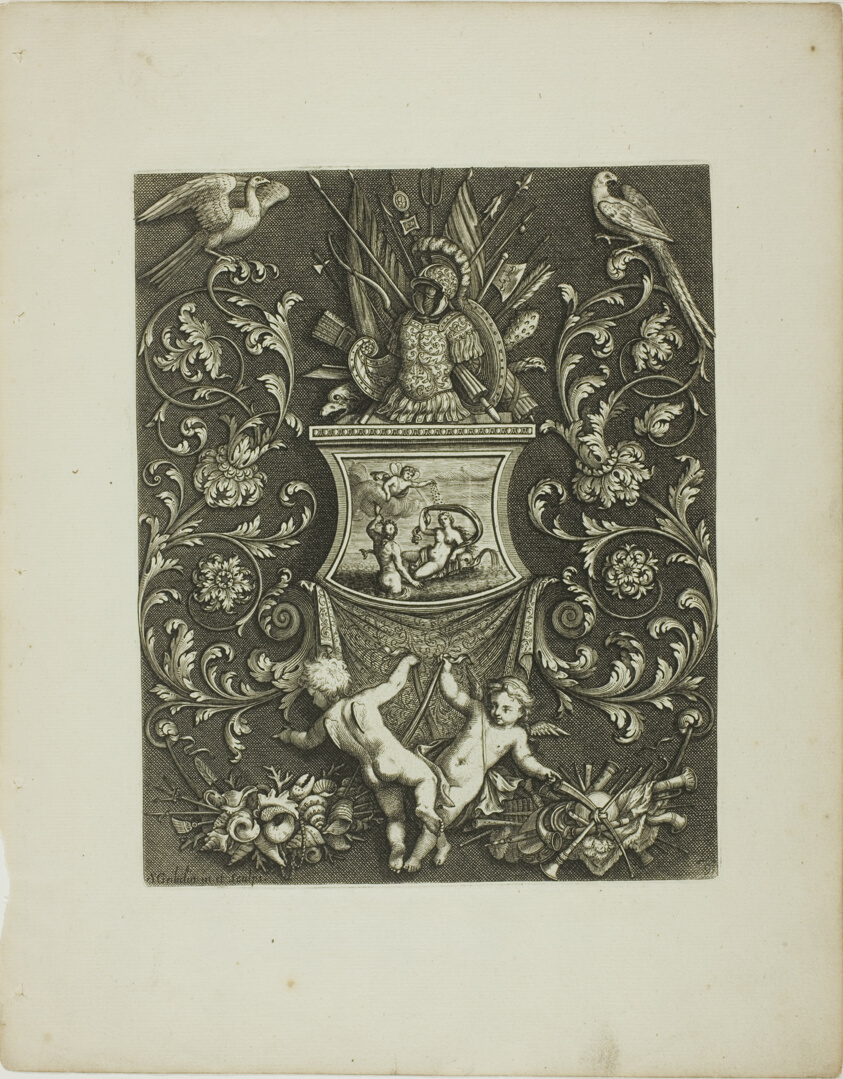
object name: Print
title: Plate Nine, from A New Book of Ornaments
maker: Simon Gribelin II; French, 1661-1733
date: 1704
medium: Engraving on paper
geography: France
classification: engraving; print; prints and drawing